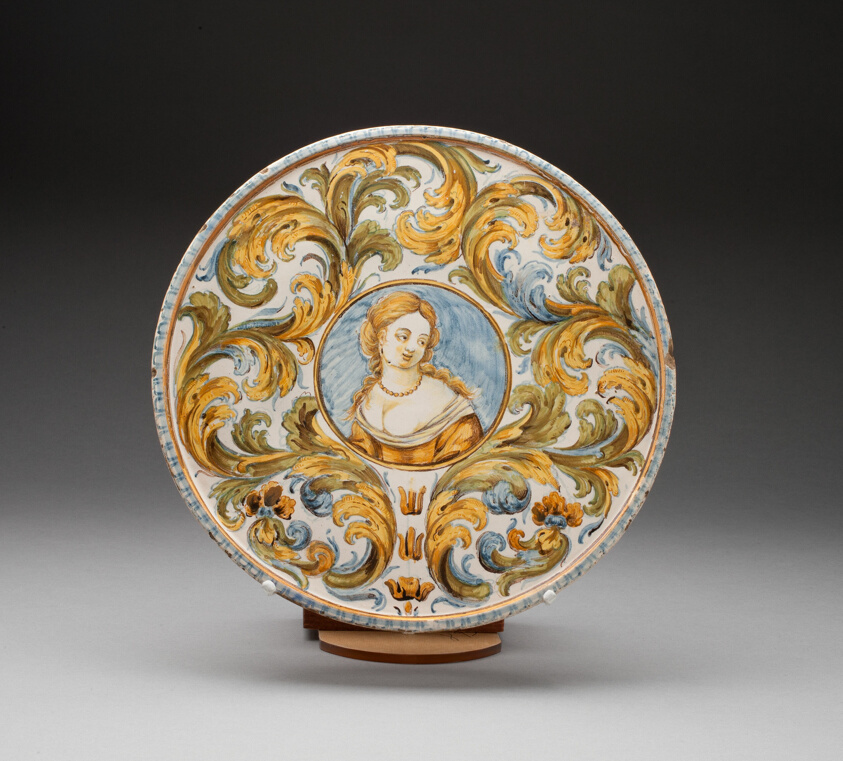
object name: Ceramics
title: Tazza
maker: Italy, Castelli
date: Early 18th century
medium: Tin-glazed earthenware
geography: Castelli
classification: earthenware; ceramics; european decorative arts